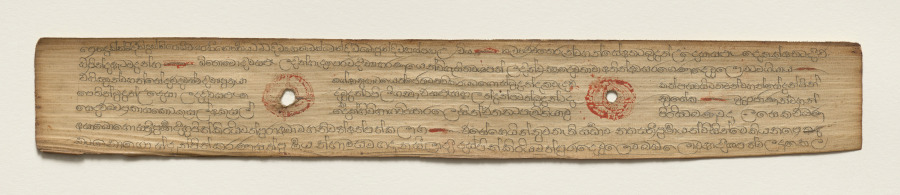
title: Leaf from a Buddhist Manuscript (verso)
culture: Sri Lanka, Singhalese, Late 17th century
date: c. 1700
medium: fiber paper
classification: Manuscript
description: Palm leaf material is still used for manuscripts in Sri Lanka. The palm leaves are prepared first by boiling them, drying them in the sun, and then rubbing them with oils. Scribes then use a metal stylus to incise the text. Then charcoal powder is wiped across the pages, filling in only the inscribed lines.